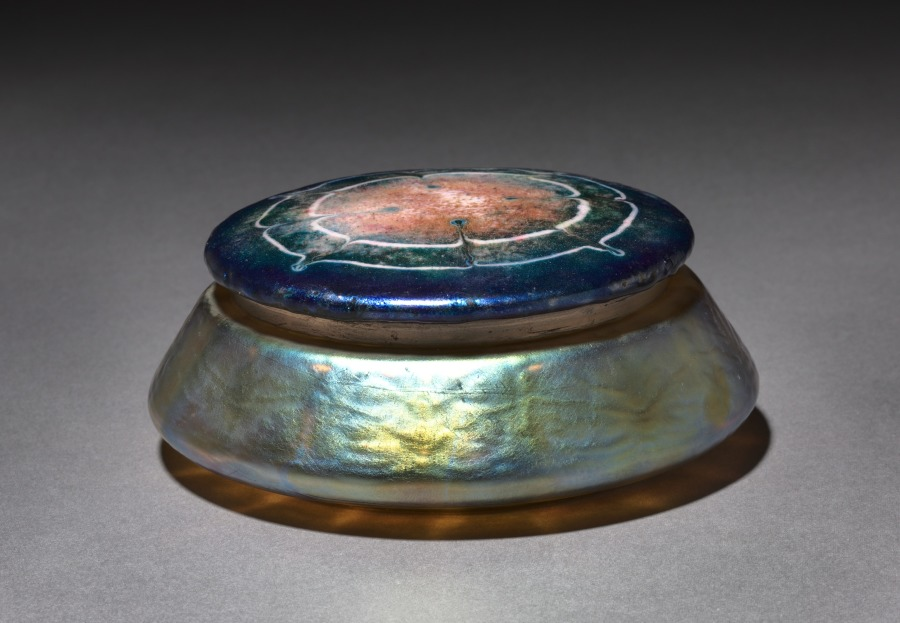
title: Covered Box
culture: America, New York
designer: Louis Comfort Tiffany (American, 1848–1933)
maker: Tiffany Glass & Decorating Company (America, New York, 1892–1902)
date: 1898–1901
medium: Favrile glass, enamel on copper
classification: Glass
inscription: engraved on bottom: 129 Louis C. Tiffany Favrile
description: By 1900 Tiffany had expanded his empire by increasing the firm’s production of “fancy goods,” including inkstands, candlesticks, clocks, small boxes, desk sets, tea screens, and other functional objects. Along with the array of artistic glass designs from his factory in Corona, Queens, works in ceramic, bronze, other metals, and even jewelry abounded. These smaller, more affordable luxury items were designed with as much thought to artistry as the great stained glass windows and lamps through which the firm enjoyed unrivaled success.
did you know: This fanciful dressing table accessory likely contained dusting powder and a feather puff.